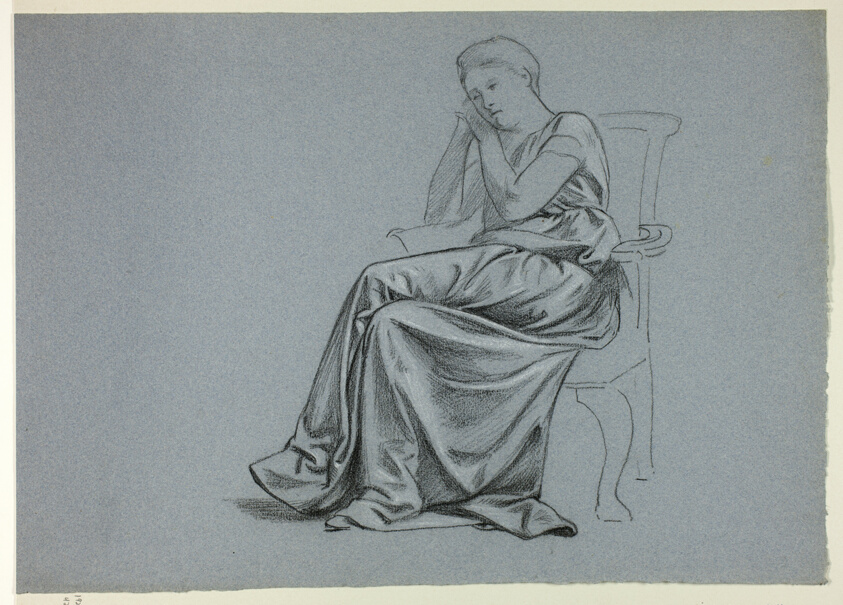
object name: Drawing and Watercolor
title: Woman in Loose Gown on Chair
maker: Henry Stacy Marks (English, 1829-1898)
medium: Black pastel, heightened with white pastel, on blue laid paper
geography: England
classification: pastel; drawings (visual works); prints and drawing